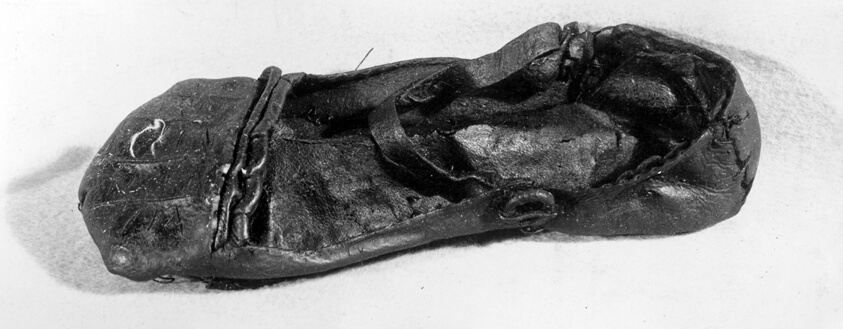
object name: Costume and Accessories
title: Child's Shoe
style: tudor, european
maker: England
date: 16th century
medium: Leather with strap and slashes toe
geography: England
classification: textile; costume accessory - shoe; shoes - misc; costume; dress (garment); clothing